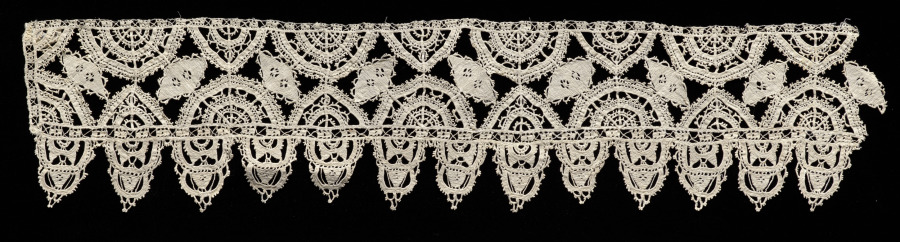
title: Lace Fragment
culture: Italy, Venice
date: 1560–99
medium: Needle lace (Punto in aria) insertion and edging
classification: Lace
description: This fragment, of extraordinary quality, is based on a Reticella design.